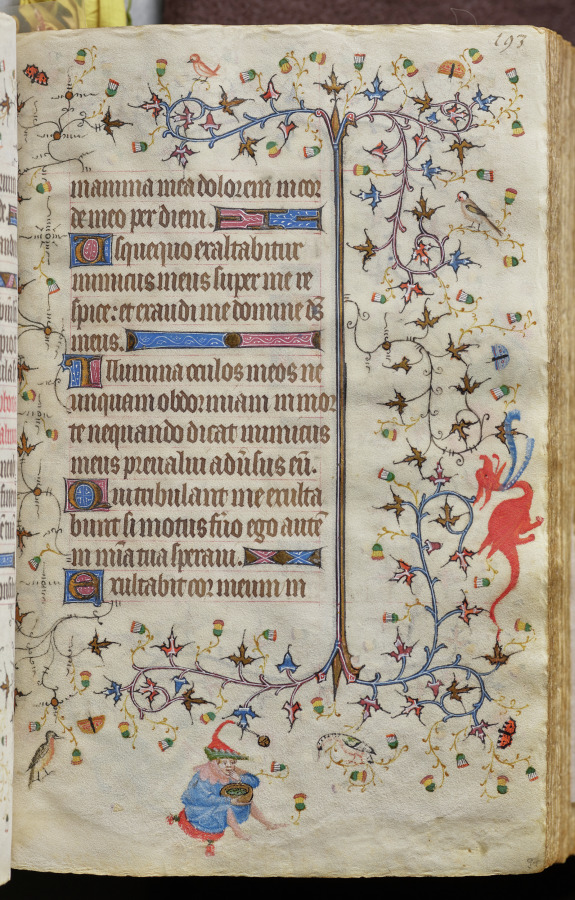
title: Hours of Charles the Noble, King of Navarre (1361-1425): fol. 97r, Text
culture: France, Paris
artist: Master of the Brussels Initials and Associates (French)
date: c. 1405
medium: ink, tempera, and gold on vellum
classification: Bound Volume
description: This precious volume was obviously highly prized by its owner, the French-born King of Navarre, who had his coat of arms painted on no less than twenty folios. Rather than directly commissioning this manuscript from a specific workshop, it seems that Charles the Noble acquired his book of hours -- perhaps ready-made for the luxury market -- while on a trip to Paris in 1404-05. A collaborative effort, six painting styles are evidenced within the pages of this codex, those of two Italians, two Frenchmen, and two Netherlanders. The painter who was responsible for the planning and decoration of the book, and who produced seventeen of the large miniatures, was a Bolognese artist known as the Master of the Brussels Initials. His principal assistant, responsible for most of the borders, was a Florentine who signed his name "Zecho" da Firenze on folio 208 verso.